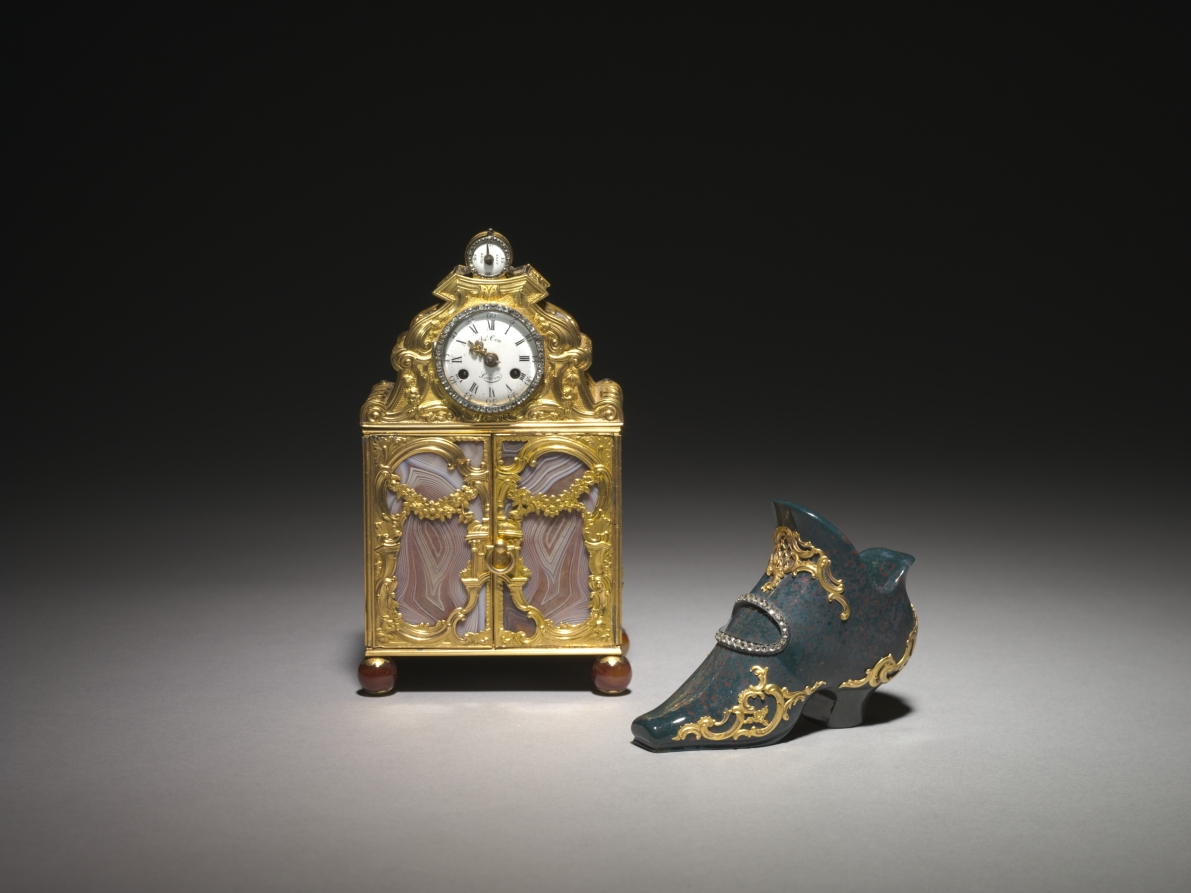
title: Miniature Shoe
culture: Russia, St. Petersburg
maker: House of Fabergé (Russian, 1842–1918)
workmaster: attributed to Mikhail Evlampievich Perkhin (Russian, 1860–1903)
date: c. 1895–1900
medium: bloodstone, gold, diamonds, silver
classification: Miscellaneous